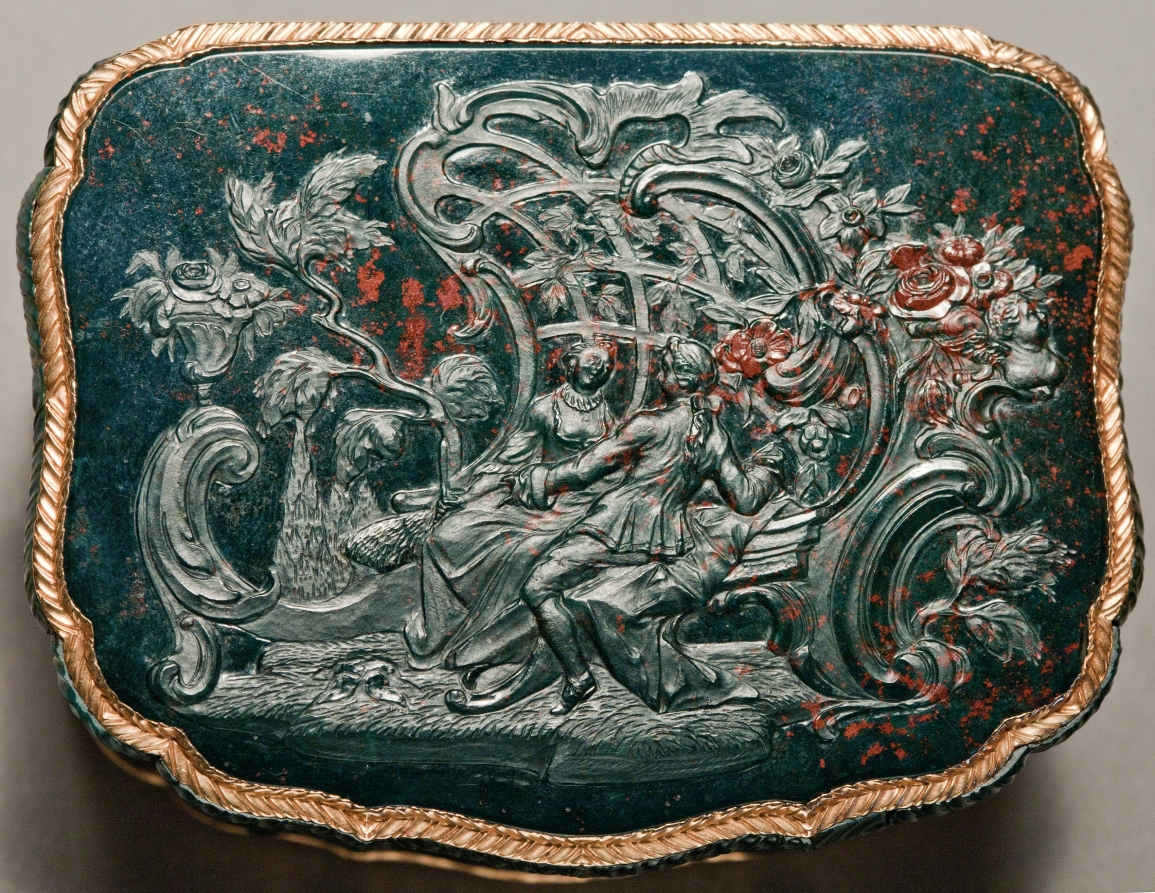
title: Snuff Box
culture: Germany, Berlin, mid-18th century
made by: attributed to Johannes George Klette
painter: Carl Gustav Klingstedt (Swedish, 1657–1734)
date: c. 1750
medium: gold-mounted carved bloodstone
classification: Miscellaneous